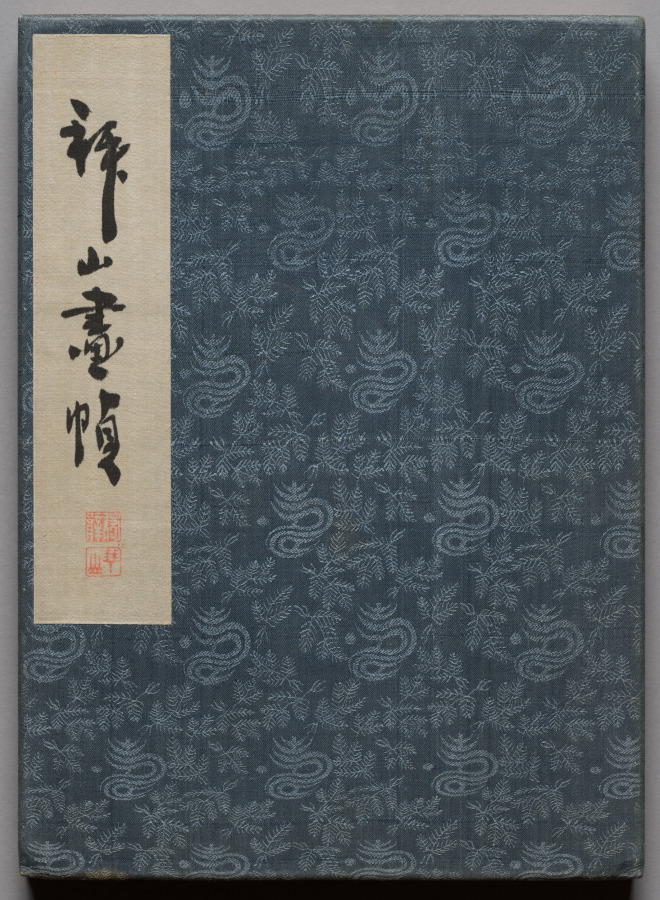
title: Album of Paintings by Haizan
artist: Yoshitsugu Haizan (Japanese, 1846–1915)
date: late 1800s-early 1900s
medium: double-sided accordion album; ink and color on paper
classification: Bound Volume